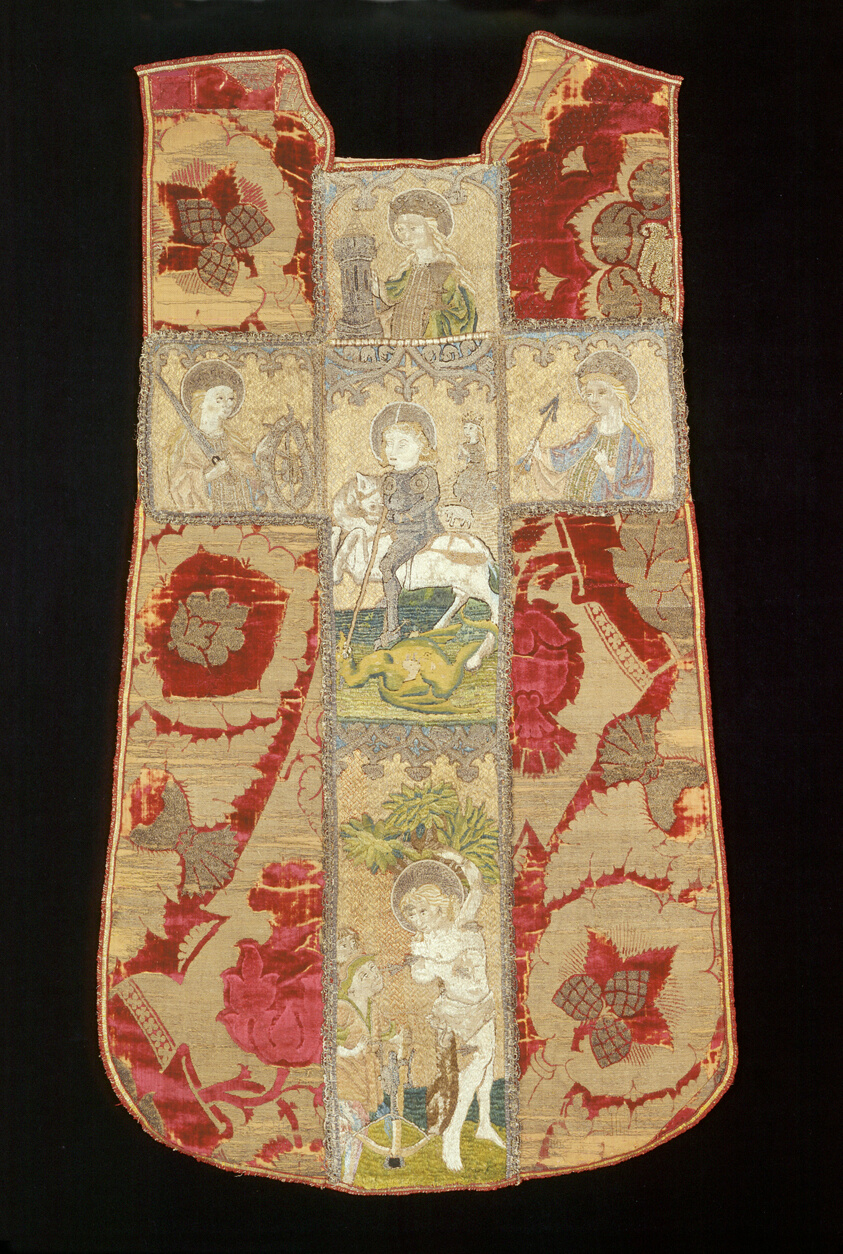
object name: Textile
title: Chasuble Front with Orphrey Cross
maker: Chasuble: Italy, Florence; Orphrey Cross: Bohemia or Germany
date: Chasuble: 15th century; Orphrey Cross: 1401/50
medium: Chasuble: silk and metal-wrapped thread, brocaded silk velvet with two heights of silk pile, and metal-wrapped threat boucle. Orphrey Cross: silk and metal-wrapped thread, embroidered in flat and padded couching stitches and split stitches on linen plain weave foundation.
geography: Florence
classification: textile; needlework (visual works); liturgical; weaving - velvet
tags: people, circles, fruit, religious scenes